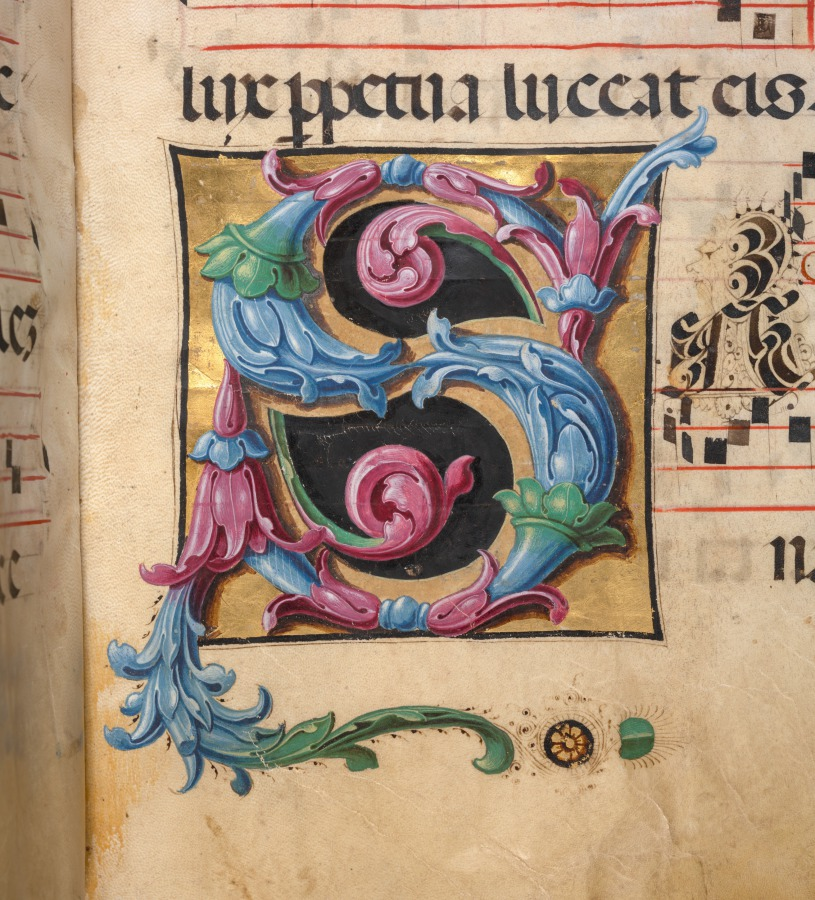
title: Gradual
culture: Italy, Verona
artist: circle of Girolamo dai Libri (Italian, 1474–1555)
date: c. 1520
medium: ink, tempera, and gold on parchment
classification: Manuscript